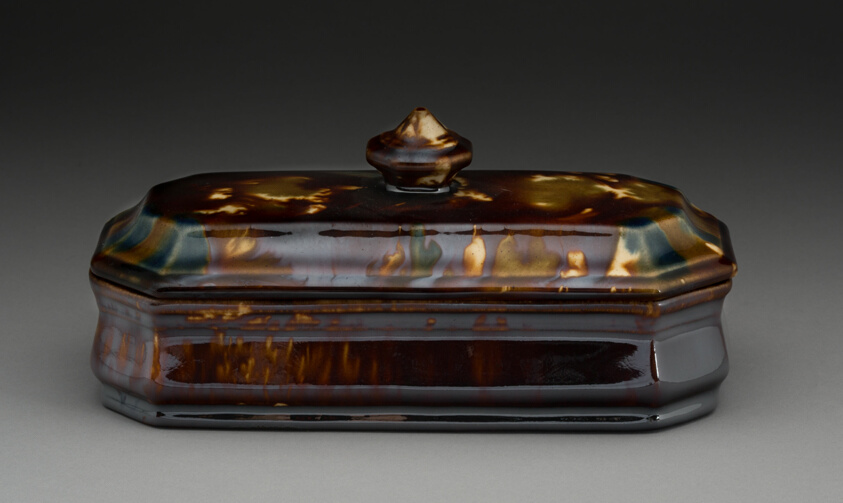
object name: Decorative Arts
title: Toilet Box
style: Folk Art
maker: Lyman, Fenton & Co.; American, 1849–1852; Bennington, Vermont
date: 1849–52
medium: Earthenware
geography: Bennington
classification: container; box; american decorative arts; american arts; ceramics; decorative arts